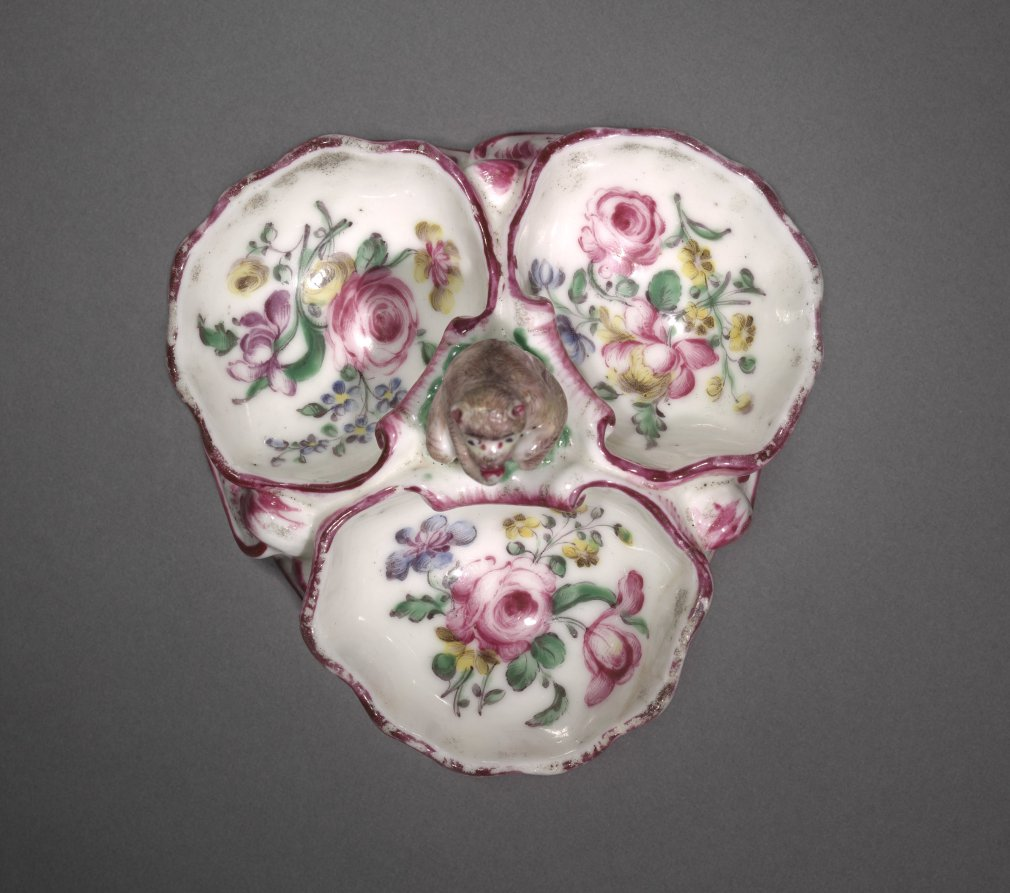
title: Triple Salt Cellar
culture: France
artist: Mennecy Factory (French)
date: c. 1765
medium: Soft-paste porcelain with enamel decoration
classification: Ceramic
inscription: [Incised]: DV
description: In 16th-century France, salt was costly and often displayed in exceptionally designed and decorated salt cellars that reinforced wealth and status. Still elegantly designed and ornamented, this triple salt cellar is small, a result of the decreasing decorative and symbolic importance of salt in the latter half of the 1700s. With its floral decoration and whimsical monkey-shaped handle, this object’s design is characteristic of the Rococo style.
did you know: This triple salt cellar might have held a variety of ingredients including powdered spices, celery or garlic salt.